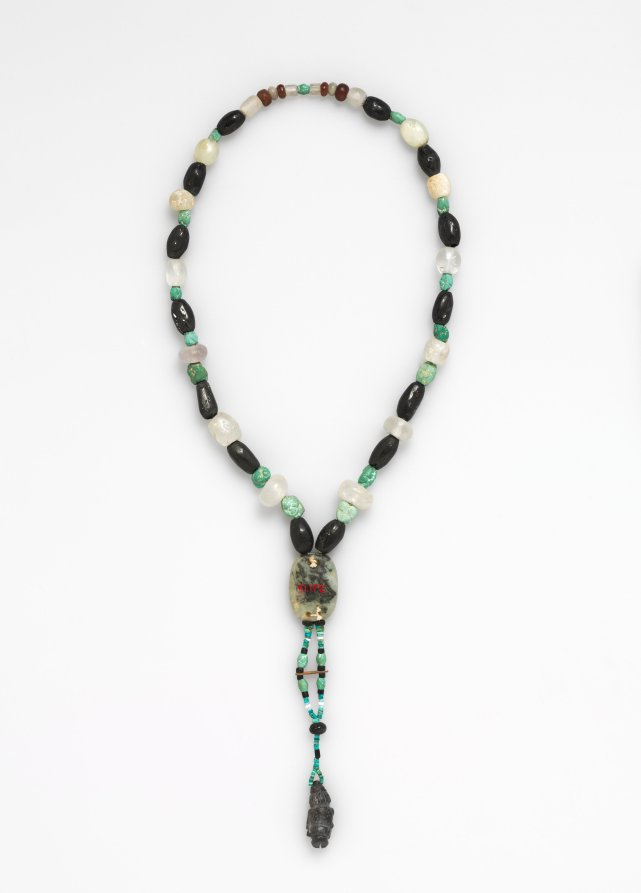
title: Necklace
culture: Peru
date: before 1532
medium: polished stone beads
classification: Jewelry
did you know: These ancient beads were restrung in modern times.